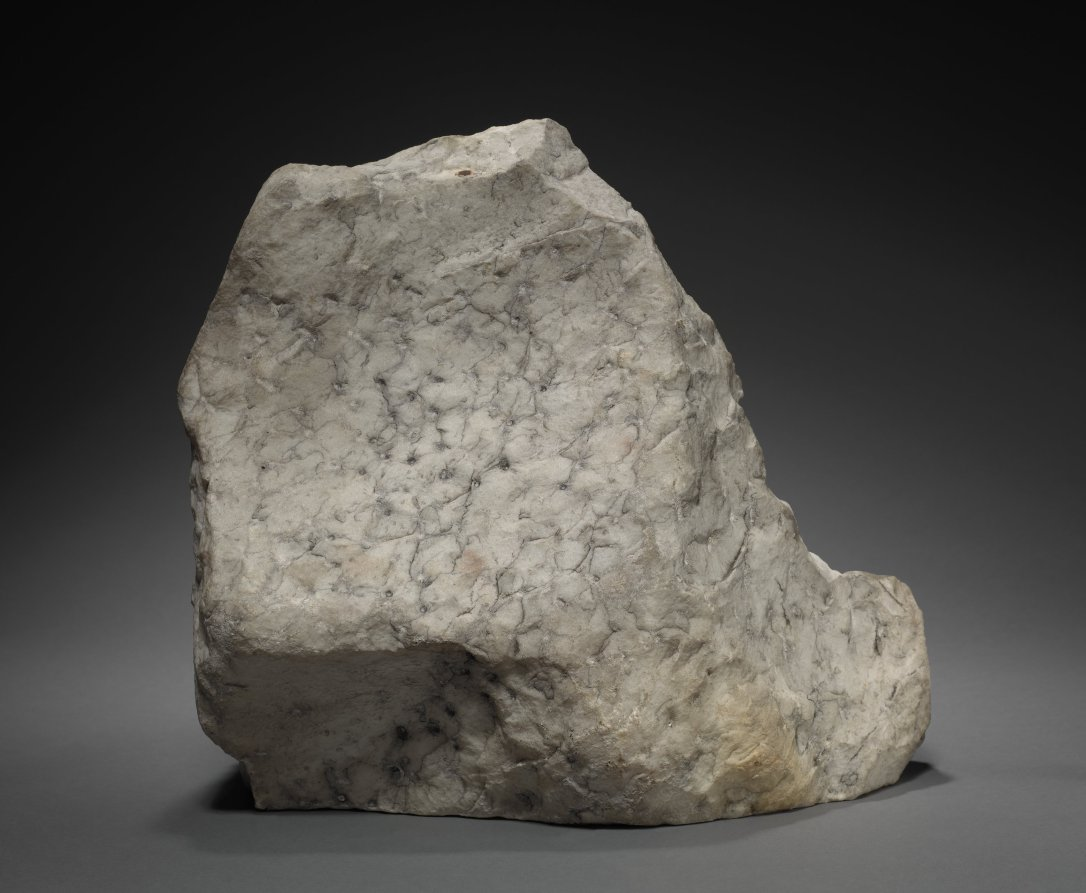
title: Seated Figure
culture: France, 19th century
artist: Édouard Charles Marie Houssin (French, 1847–1919)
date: c. 1860 – 1919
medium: marble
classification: Sculpture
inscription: Signed lower right: "E. Hovssin"